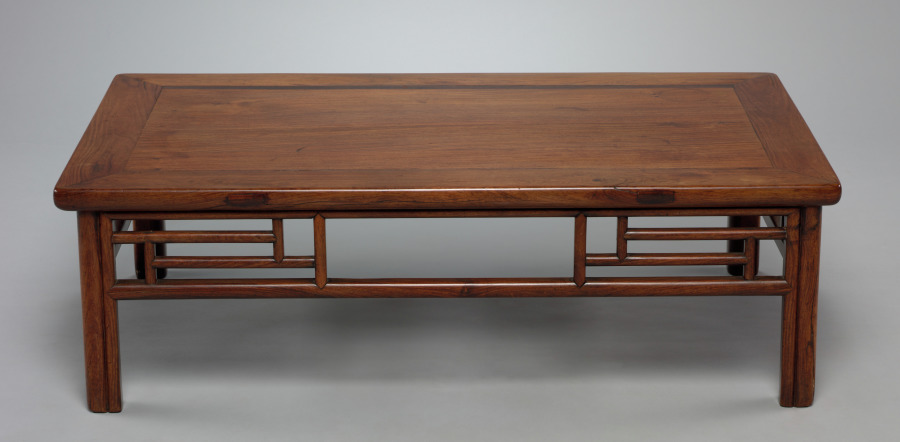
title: Table to hold a chest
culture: China, Qing dynasty (1644-1911)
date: early 1700s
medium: Rosewood (huanghuali)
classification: Furniture and woodwork